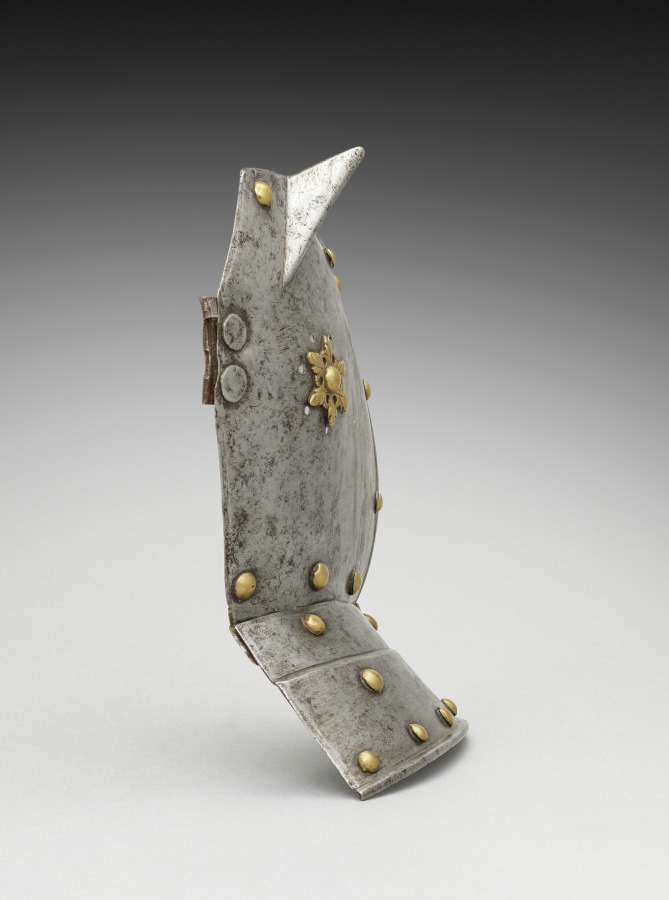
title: Ear Piece of a Helmet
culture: Germany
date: 1500s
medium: steel, brass headed rivets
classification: Arms and Armor